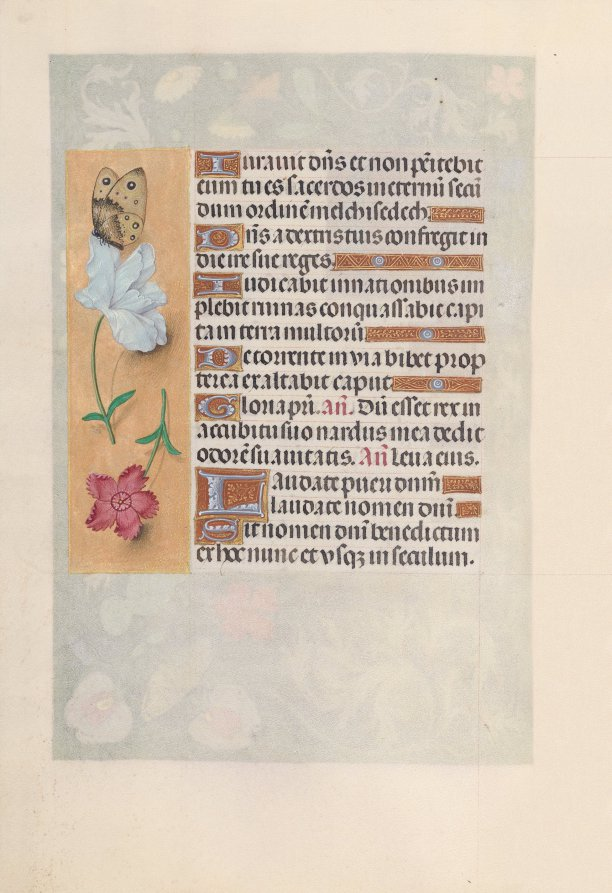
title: Hours of Queen Isabella the Catholic, Queen of Spain: Fol. 147v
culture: Flanders, Ghent and Bruges, late 15th century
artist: Master of the First Prayerbook of Maximillian (Flemish, c. 1444–1519)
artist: and Associates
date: c. 1500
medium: ink, tempera, and gold on vellum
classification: Bound Volume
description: This manuscript was illuminated by a circle of at least five highly organized manuscript painters active in the Flemish cities of Ghent and Bruges. The principal illuminator was Alexander Bening, who painted the majority of the book's miniatures. Manuscripts produced by this circle of artists are renowned for the decoration of their borders, which typically feature a rich variety of realistically-painted flowers, birds, and butterflies. This prayer book, called a book of hours, was intended not for a cleric, but for the private devotions of a lay person-in this case, Isabella the Catholic, Queen of Spain (1451-1504). Isabella's coat of arms embellishes the book's frontispiece. It is unlikely that the book was commissioned by the Queen herself; rather, she probably received it as a diplomatic gift from someone courting her patronage, perhaps Cardinal Francisco Jimenez de Cisneros. A Franciscan friar, Jimenez was dependent upon Isabella for his advancement, first to the post of Queen's confessor in 1492, and then to Archbishop of Toledo in 1495.